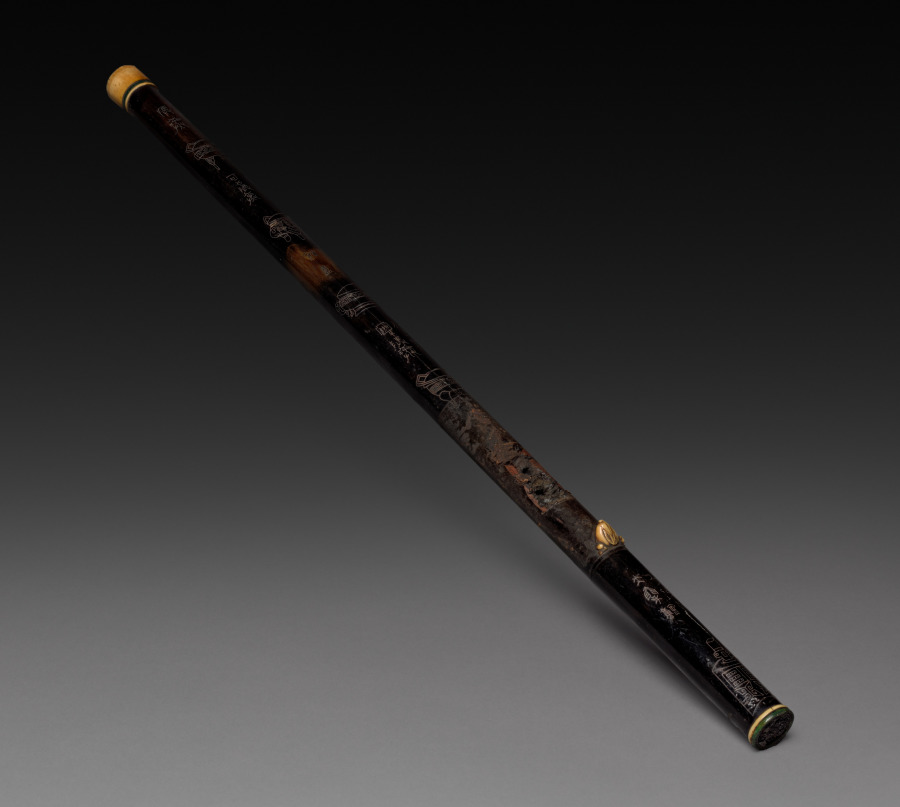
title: Opium Pipe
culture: China, Qing dynasty (1644-1911)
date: 1800s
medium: wood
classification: Miscellaneous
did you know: The pipe is decorated with images of archaic ritual bronzes.